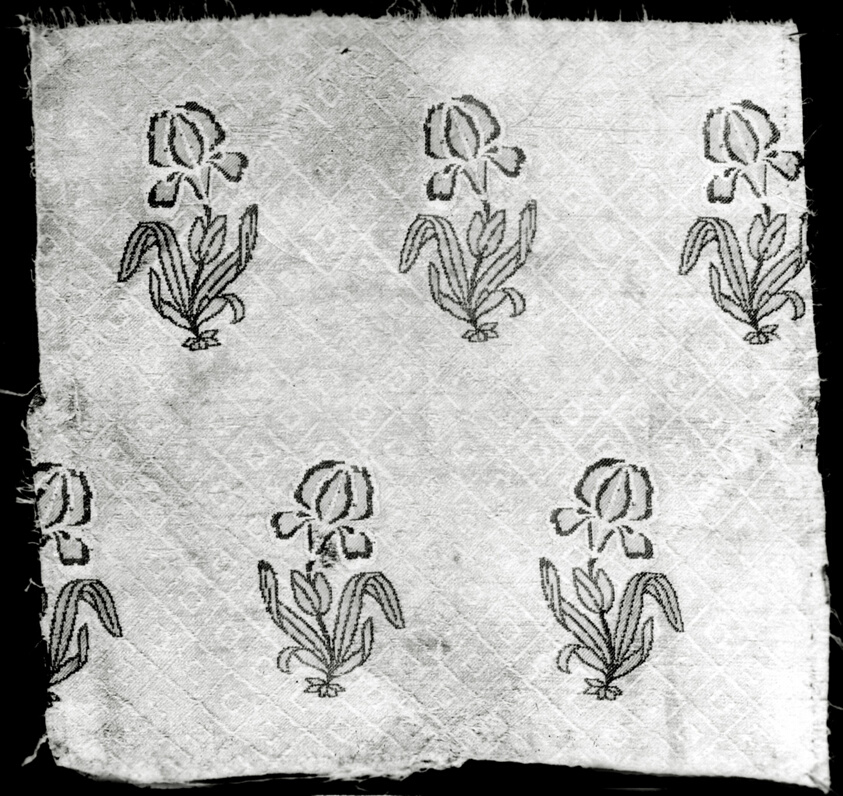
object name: Textile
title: Fragment (Dress Fabric)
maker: Iran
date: 1675/1900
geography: Iran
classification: textile; weaving